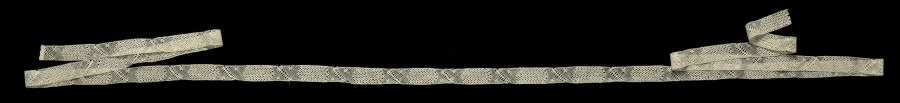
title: Lace Insertion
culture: Malta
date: 1700s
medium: Bobbin lace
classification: Lace